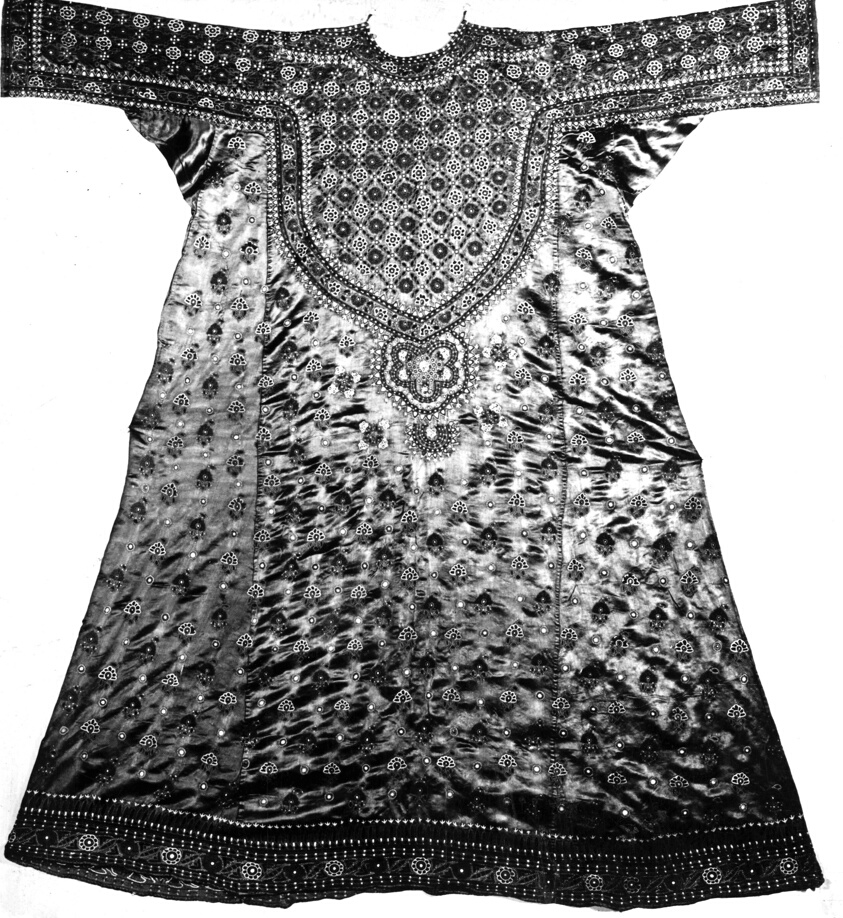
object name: Textile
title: Shirt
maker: Eastern India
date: 19th century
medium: Plain green satin embroidered in buttonhole, chain, and ladder stitches with red, yellow, black, and white silk inset with tny mirrors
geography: India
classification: textile; costume; dress (garment); clothing